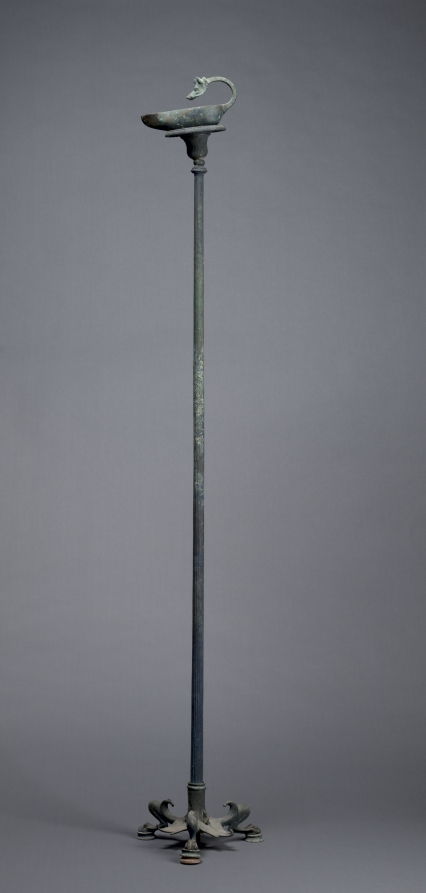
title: Lamp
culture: Italy, Roman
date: 100–1 BCE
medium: bronze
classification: Metalwork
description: Bronze lamps like this one were used to create artificial light. A wick was placed in the nozzle and oil poured into the opening below the handle. Here the handle terminates in an elaborate boar’s head, with its bristly hair indicated with tiny lines. When the lamp was lit, figural handles, like this boar, would cast complex and interesting shadows. This lamp and stand were not found together, but illustrate how they would have been used in antiquity.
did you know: Romans used olive oil as their main lamp fuel.